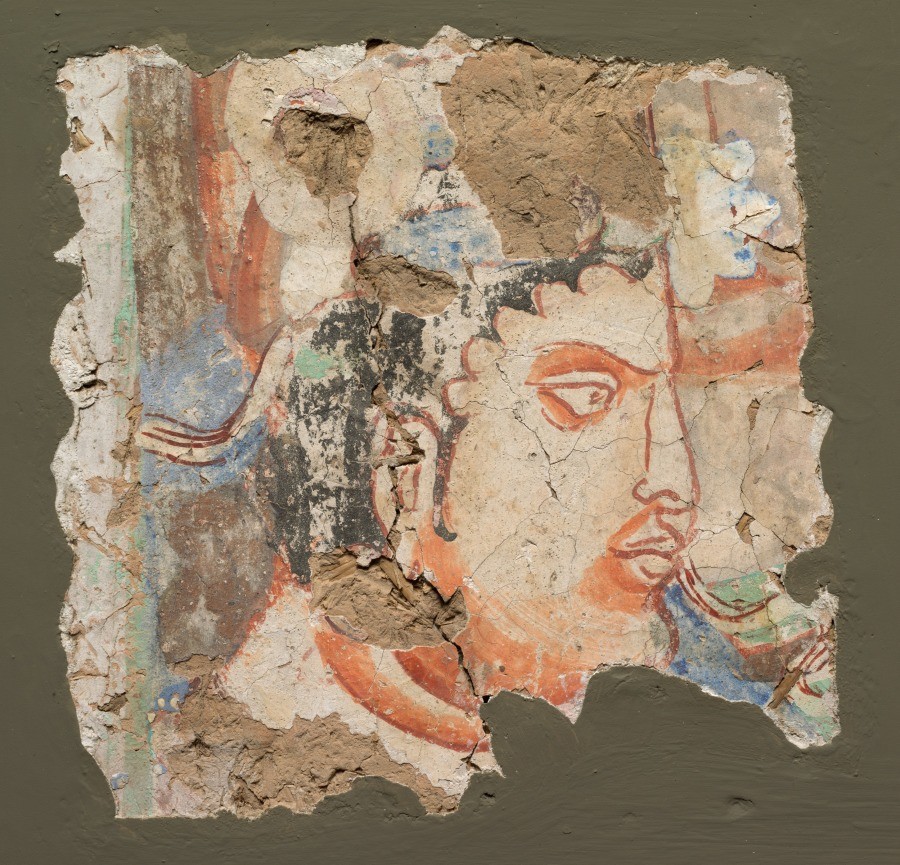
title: Fragment with a Head of Bodhisattva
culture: Central Asia, Kizil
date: c. 600–650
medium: fresco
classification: Painting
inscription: "Second group of caves, cave no. 76" Excavated during 4th expedition, shipped in "crate number 74."